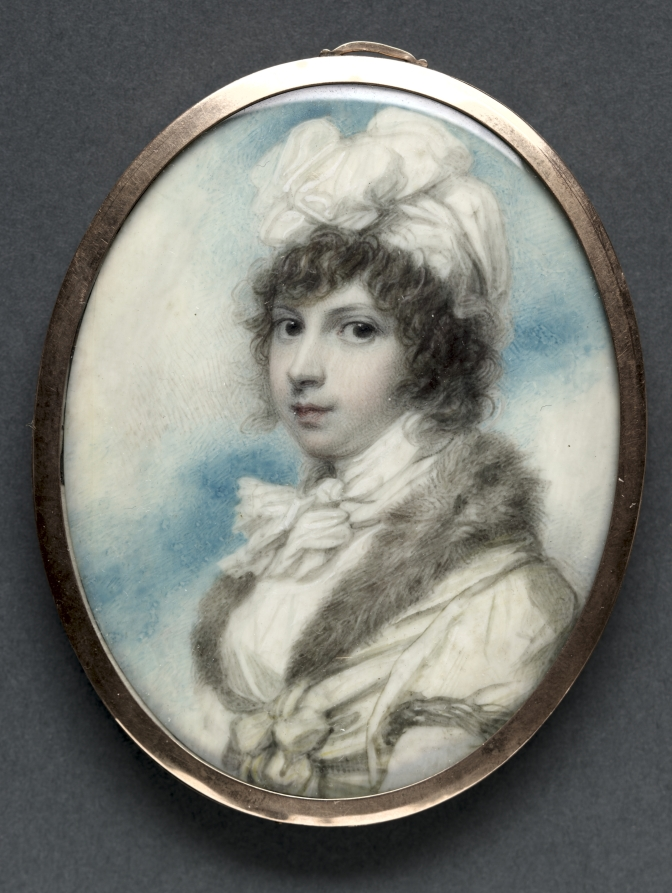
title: Portrait of the Hon. Anne Annesley, later Countess of Mountnorris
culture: England, 19th century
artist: Richard Cosway (British, 1742–1821)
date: c. 1800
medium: watercolor on ivory in a gold frame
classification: Portrait Miniature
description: Anne Annesley (née Courtenay, 1774–1835) was the eighth daughter of William 2nd Viscount Courtenay, and sister of William 3rd Viscount Courtenay, who commissioned numerous paintings of himself and his six sisters from Richard Cosway in oil and miniature. William’s expenditure for these works between 1790 and 1812 reached £1,370, a bill that wasn’t paid in full until 1820. Anne married George Annesley, later 2nd Earl of Mountnorris, in September 1790. Cosway, who frequently depicted female sitters in gauzy white gowns, lavished attention on Anne’s attire. Her pale yellow coat is lined with fur that is sensitively delineated with a combination of short brushstrokes distinct from those that form her dark, wavy hair. Fur-trimmed jackets like this one would probably have been worn indoors by women during the colder months.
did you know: Another version of this portrait is nearly identical to the Cleveland miniature and was likely for another friend or member of Anne's family.